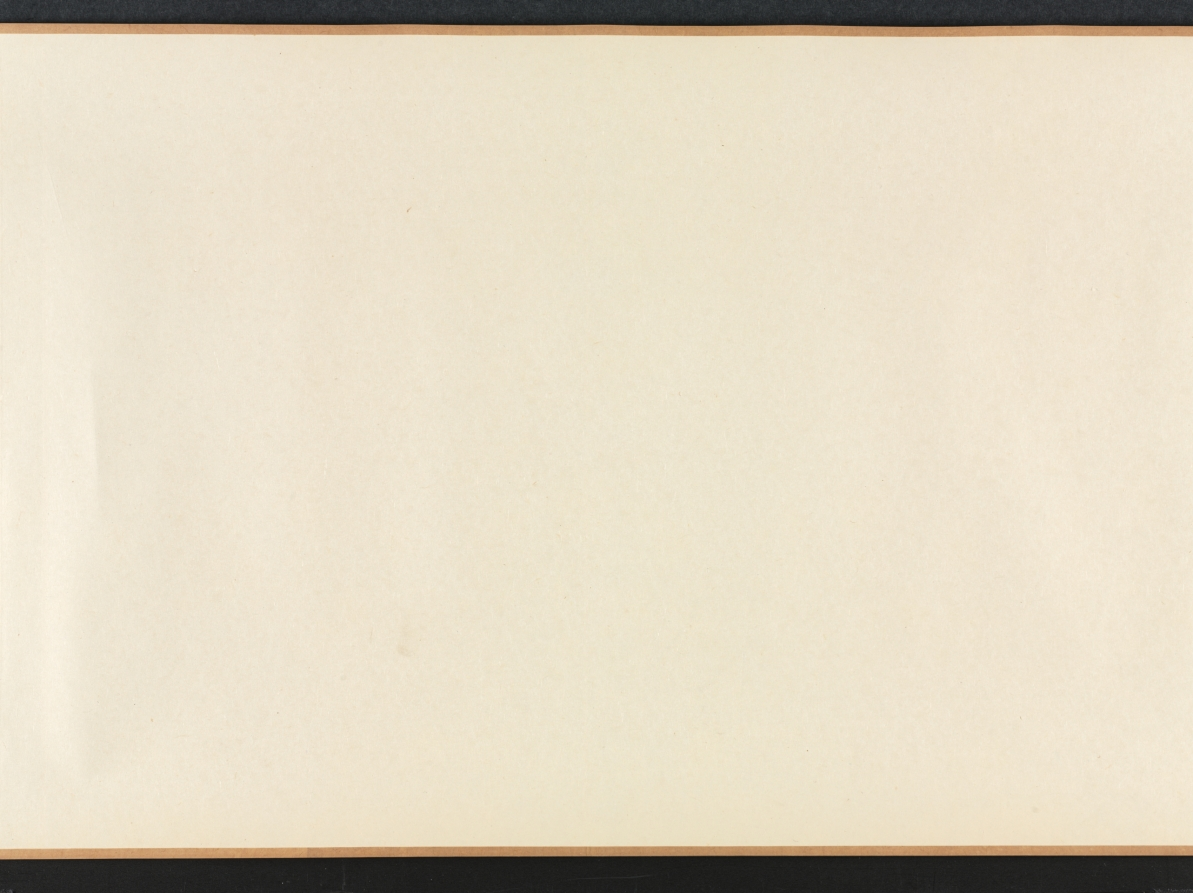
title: Hall of Lofty Pines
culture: China, Qing dynasty (1644-1911)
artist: Wang Hui (Chinese, 1632–1717)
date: 1703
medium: handscroll; ink and color on paper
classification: Painting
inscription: [題] 松喬堂圖 康熙癸未夏六月, 海虞耕煙散人王翬畫。[印]王翬之印; 石谷. [左下] 來青閣; 耕煙野老時年七十有二.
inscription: 松喬堂圖一卷，海虞石谷王君為靜海近公厲少司冦公作也。圖成于癸未之夏。未幾而公遂仙去。公令子今編修君南湖屬余題跋其後。余與公同官侍從，交契最深。側見公之清修純德，蔚為聖天子所眷重。侍直內廷，密勿贊襄，幾二十餘年。蒼生之所以受賜，士林之所以沐德者，天下莫能窺，在廷莫能悉。而公卒不言。以故宸衷日益契，恩禮亦日益渥。雖年逾懸車，時有歸老之念。而上固不聼公之去。其所謂松喬堂者，御書以賜公者也。蓋以松比公之清風勁節，而歲寒不改，經霜彌茂。則又以期公之壽考未有艾焉。公知此身未易乞，而山林槃磵之樂，止可寄諸寤思。此松喬堂圖之所由作也歟。石谷此圖，結構精密，筆墨超邁。其寫樹木之蒼蔚，堂宇之靚幽。恍見摩詰輞川樂天廬山之勝。獨惜公未得一日徜徉故園以償其願。即繪於圖亦未得以永其趣，此編修君之所以眷眷不忘也。雖然千歳之松喬，下蔭百畝，上以修棟梁之需。然則上當日名堂之意，不更望於後之人襲其芘而養其材也哉。吾願編修君之寶斯圖。并望君之塗塈丹雘，大其堂構也已矣。 康熈丙戍重陽三日，雲間王鴻緒跋。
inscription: 10 additional seals: 1 seal of Li Duna 勵杜納 (1628–1703); 4 seals of Zha Ying 查瑩 (jinshi of 1766); 5 seals of Li Yun (dates unknown).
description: Wang Hui 王翬, a leading painter in the orthodox school of the early Qing dynasty (1644–1911), was commissioned to paint this landscape with a country estate for Li Duna 勵杜納 (1628–1703), vice minister of justice in Emperor Kangxi’s court. The emperor had honored Li by granting him a piece of calligraphy with the name of Li’s retirement retreat, “Hall of Lofty Pines.” He drew a comparison between pines and Li’s upright character, resilience, and longevity. Wang Hui’s painting was supposed to allow Li to imagine living in a beautiful, secluded compound among the hills and pines. Sadly, Li died before seeing the completed painting and before receiving the emperor’s permission to retire. The landscape begins with peaceful riverbanks and low hills. The pines around the estate in the middle of the handscroll are truly lofty, some stretching even beyond the frame of the painting. Li Duna, the estate’s owner, is shown twice in his serene mountain retreat: first approaching the entrance to the compound with two servants at the right, and then later in the scroll, to the left, reading in the comfort of an inner room.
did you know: One servant carries the estate owner's carefully wrapped qin, a type of zither.